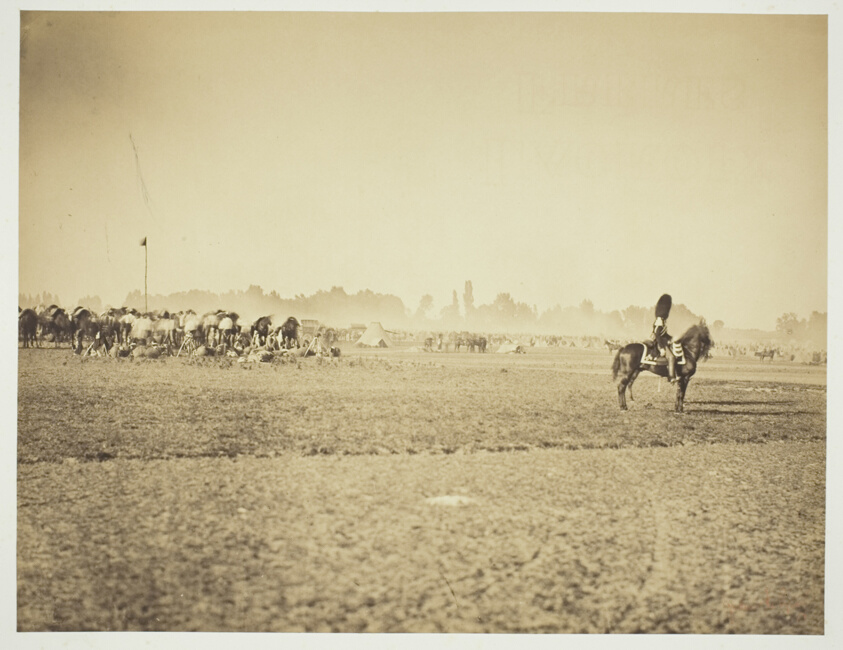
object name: Photograph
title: Untitled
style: 19th century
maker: Gustave Le Gray (French, 1820–1884)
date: 1857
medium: Albumen print, from the album "Souvenirs du Camp de Châlons"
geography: France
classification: albumen silver print; photographic process; photography; photograph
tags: Paris